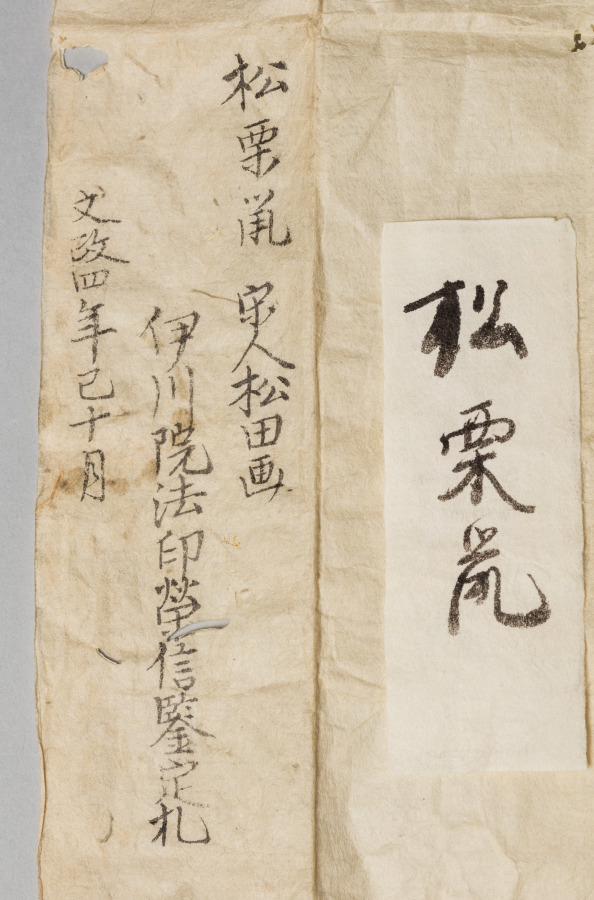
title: Squirrel on a Pine Branch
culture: China, Ming dynasty (1368–1644)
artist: Song Tian (Chinese, active 1300s)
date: 1500s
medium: hanging scroll, ink on paper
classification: Painting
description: This painting captures a squirrel in action, distracted and twisting its head while climbing and looking at a little bug to the right. The painter skillfully employs a combination of ink washes and fine brushstrokes to simulate the animal’s fur. Only three simple curved lines depict the squirrel’s claws. The subject of squirrels did not appear in Chinese painting before the late Southern Song (1127–1279) and Yuan periods (1279–1368). The painter Songtian was one of the few Yuan painters who specialized in this theme.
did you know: Although the evergreen pine does not indicate a time of year, the lively activity of the squirrel and the insect suggest a warm season.